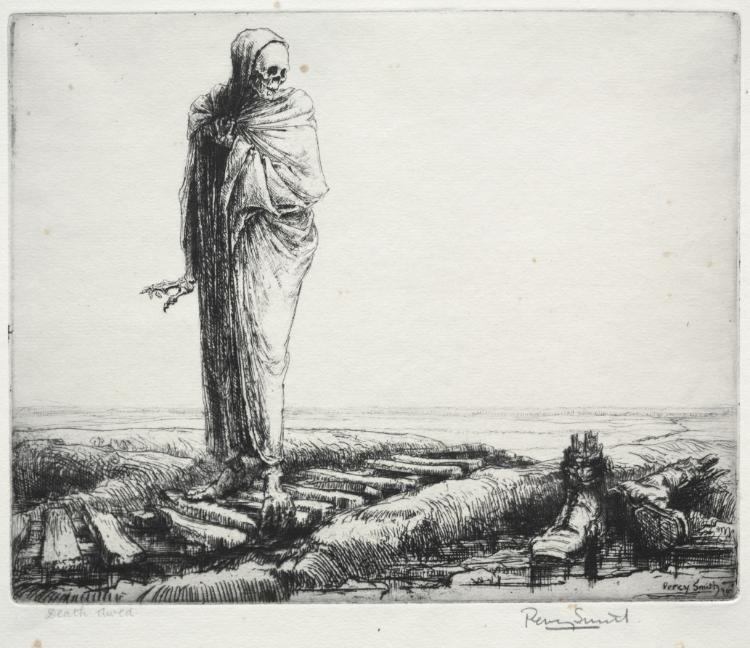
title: Dance of Death: Death Awed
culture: England, 20th century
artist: Percy John Delf Smith (British, 1882–1948)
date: 1919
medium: etching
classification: Print